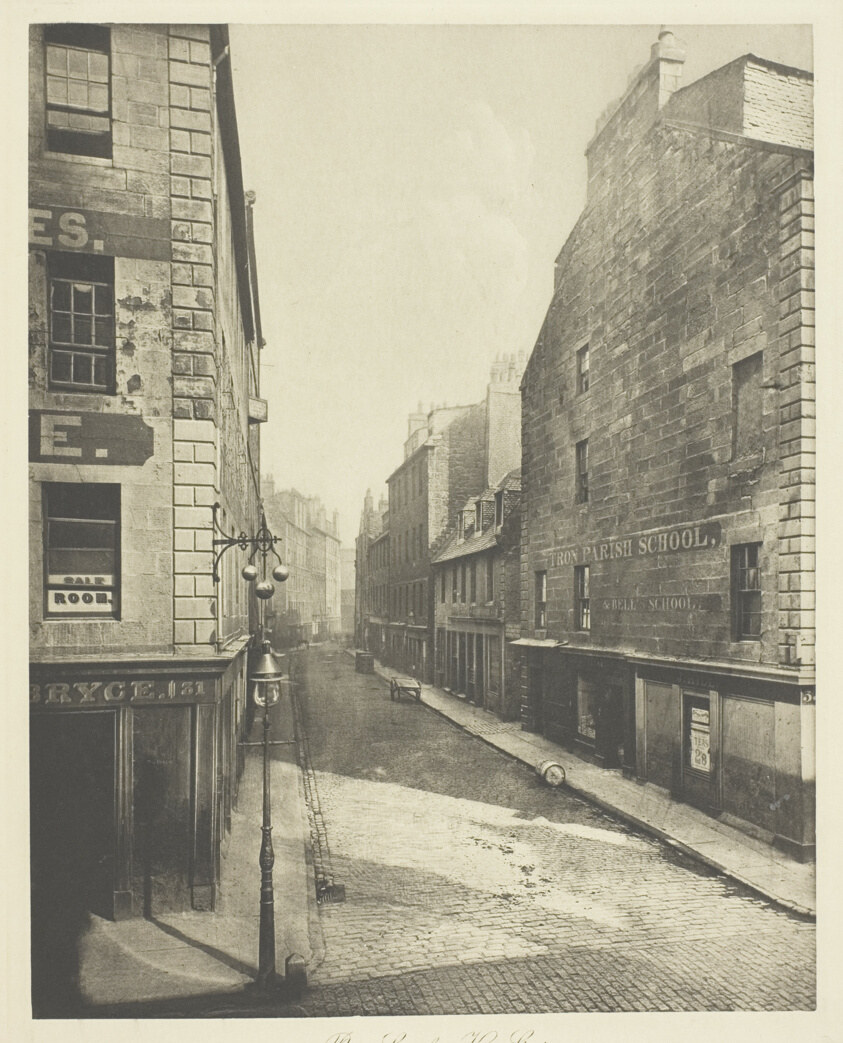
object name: Photograph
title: Princes Street from King Street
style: 19th century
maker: Thomas Annan (Scottish, 1829–1887)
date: 1868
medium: Photogravure, plate 24 from the book "The Old Closes & Streets of Glasgow" (1900)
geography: Scotland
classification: photograph; photography